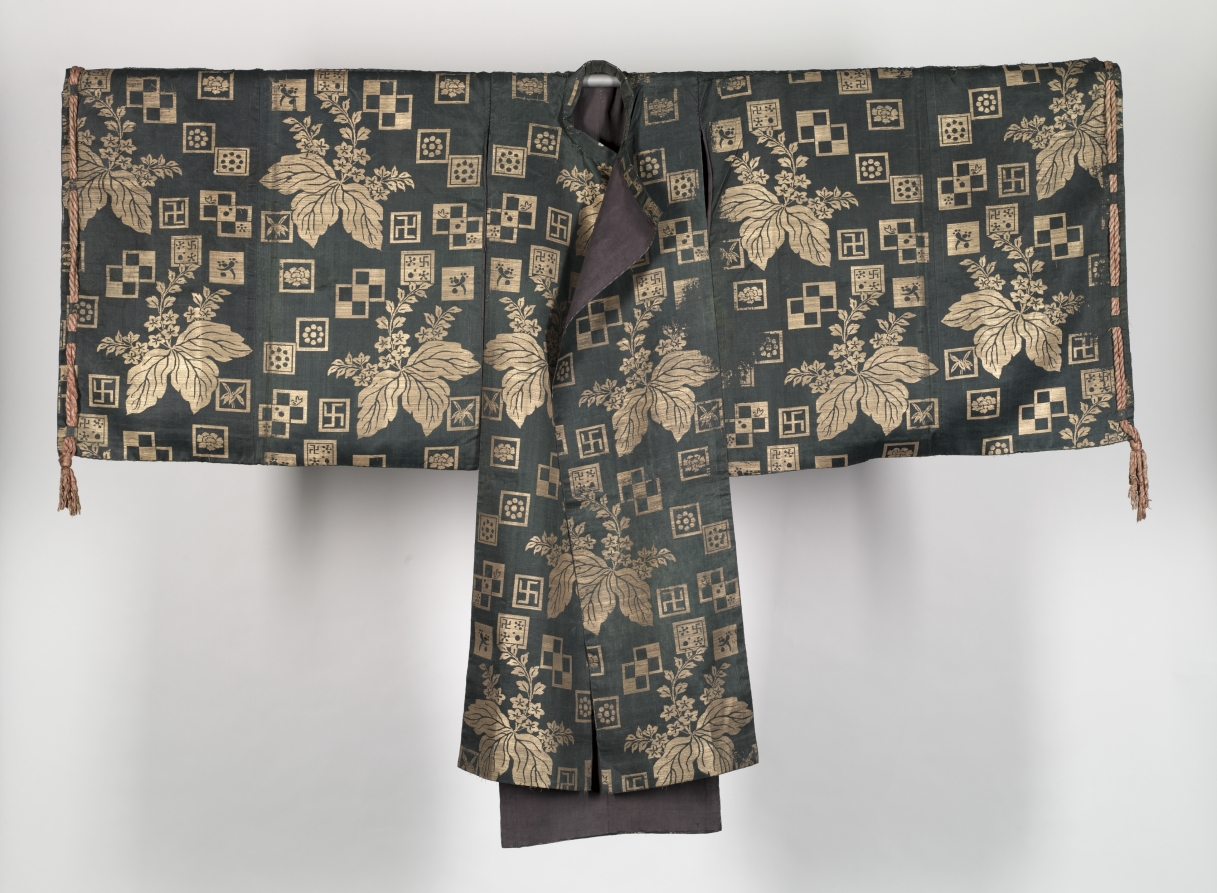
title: Noh Robe (Kariginu)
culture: Japan, Edo period (1615–1868)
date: 1800–1850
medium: silk, satin weave (?) with supplementary metal thread weft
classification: Garment